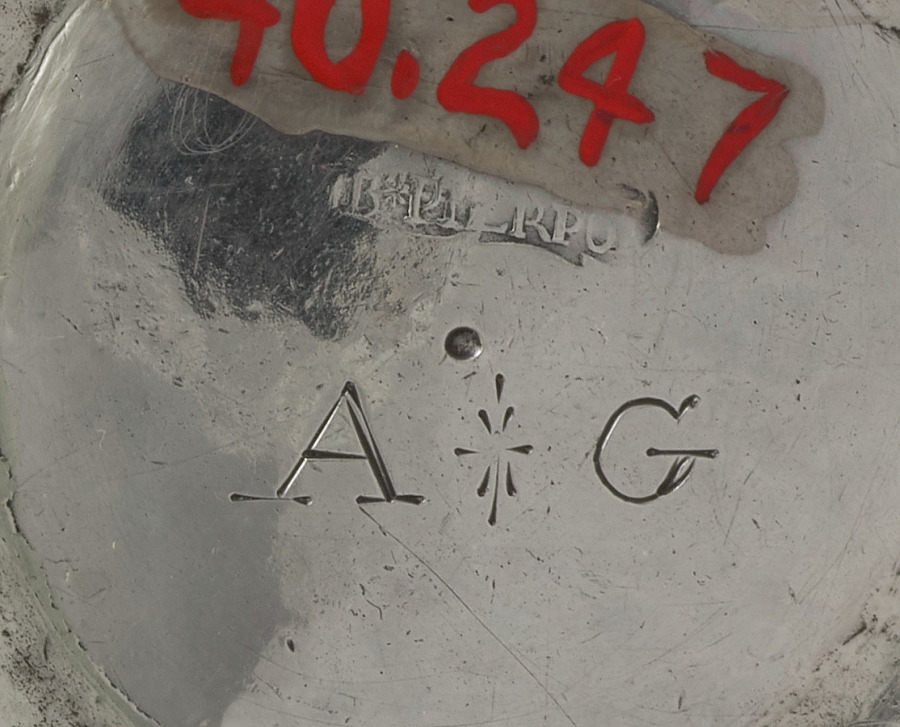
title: Cann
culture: America, Massachusetts, Boston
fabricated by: Benjamin Pierpont (American, 1730–1797)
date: c. 1760–70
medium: silver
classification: Silver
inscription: engraved "A*G" in block letters on bottom.